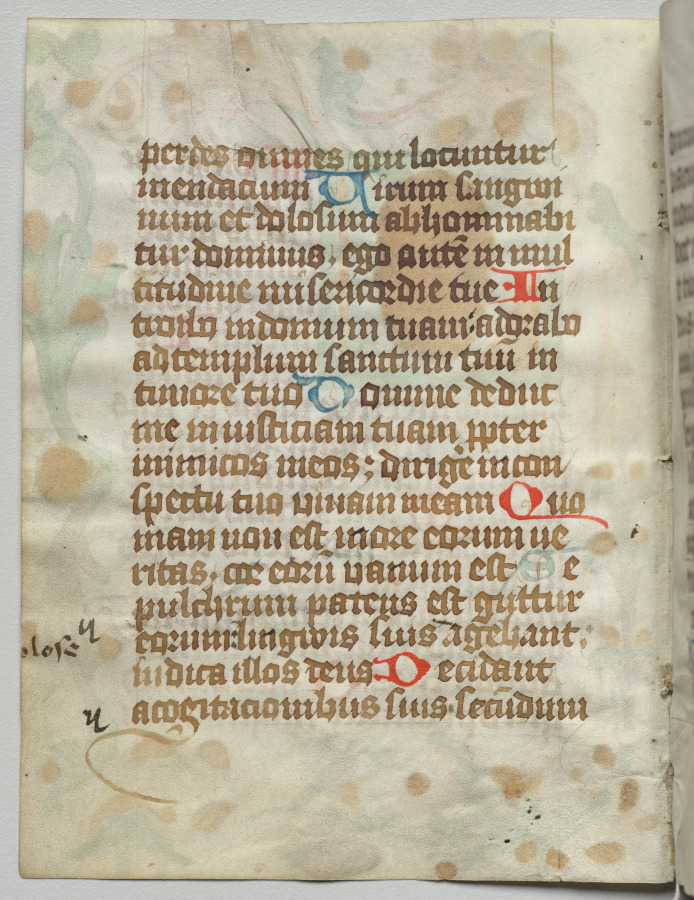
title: Bifolio from a Book of Hours: Text (verso)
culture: Austria (? ) or Bohemia (?), 15th century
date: c. 1460–1500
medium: ink, tempera and gold on vellum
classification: Manuscript